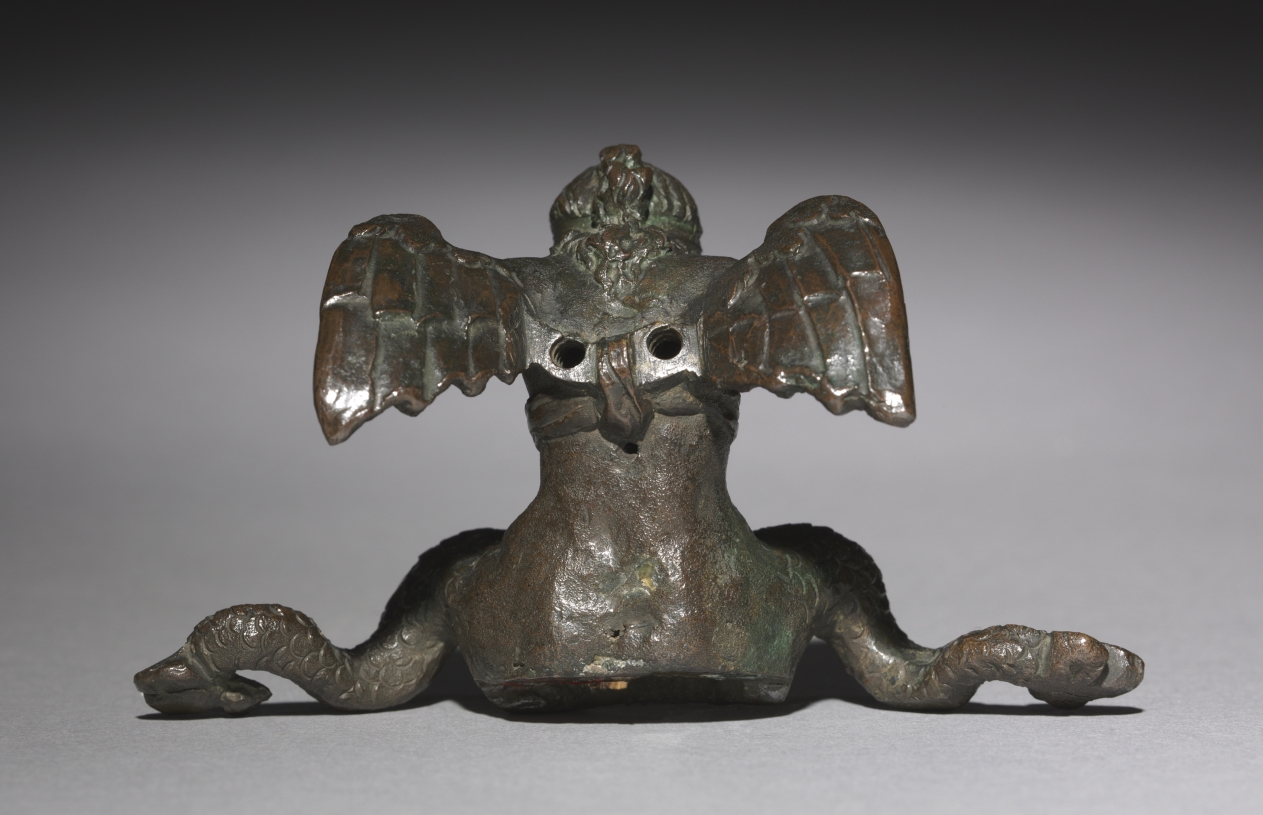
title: Doorpull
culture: Italy, 16th century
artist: Leone Leoni (Italian, 1509–1590)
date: 16th century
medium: bronze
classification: Sculpture